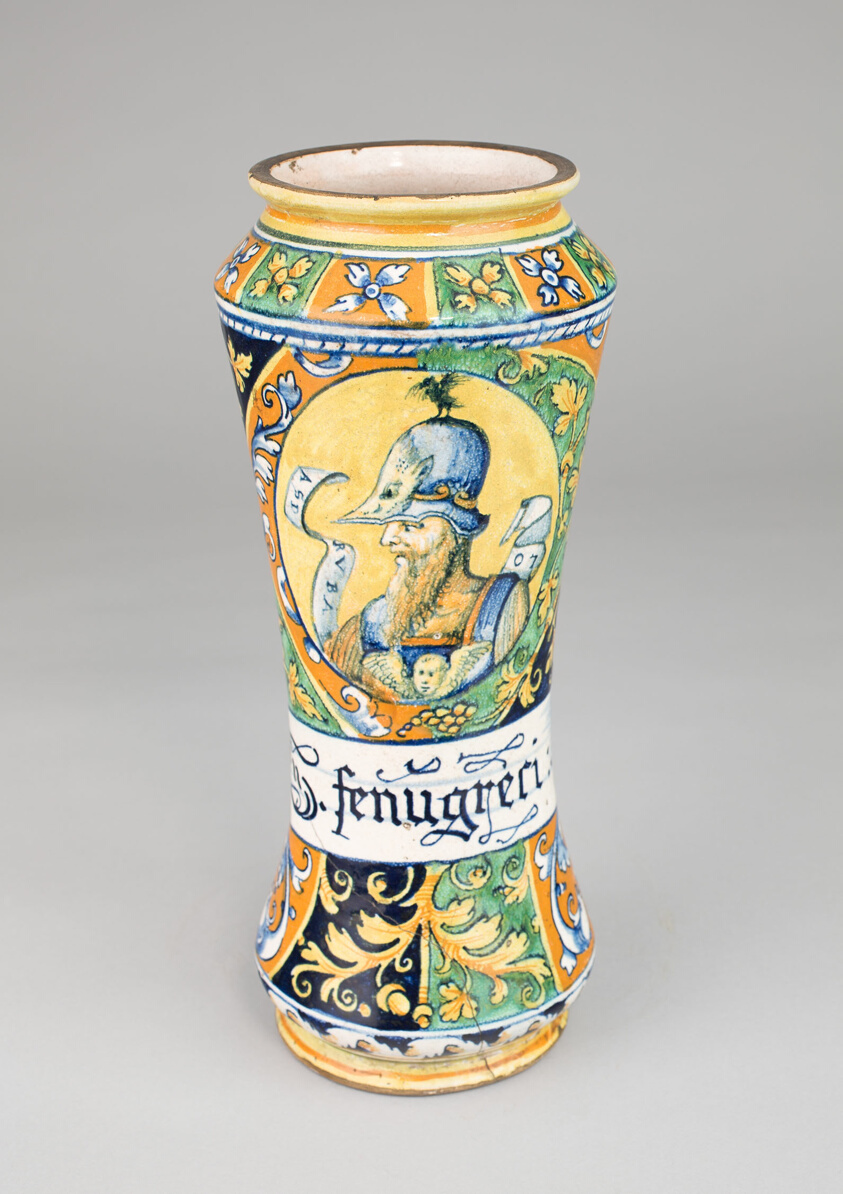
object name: Ceramics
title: Drug Jar (Albarello)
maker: Italian, Urbino (Castel Durante) or Sicily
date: c. 1550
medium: Tin-glazed earthenware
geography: Urbania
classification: earthenware; european decorative arts; ceramics; decorative arts